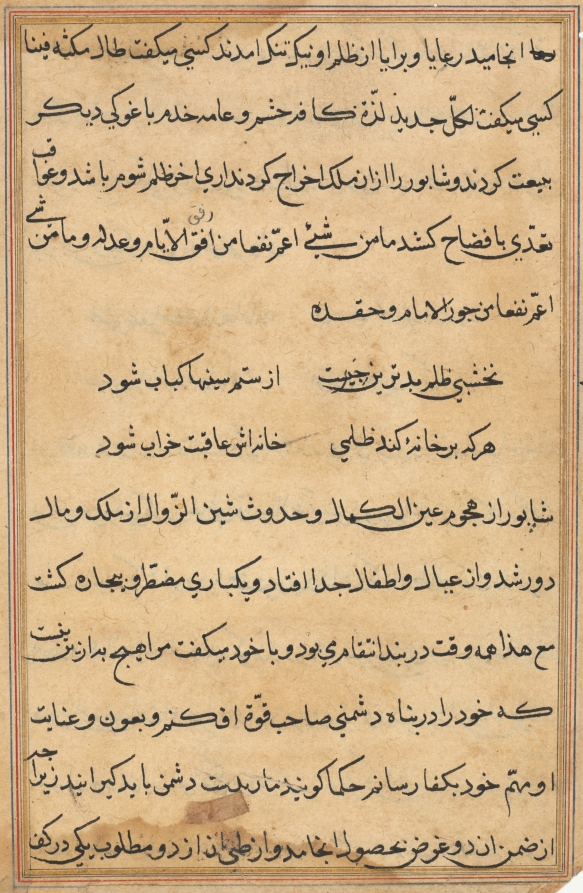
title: Page from Tales of a Parrot (Tuti-nama): text page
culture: Mughal India, court of Akbar (reigned 1556–1605)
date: c. 1560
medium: gum tempera, ink, and gold on paper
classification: Painting